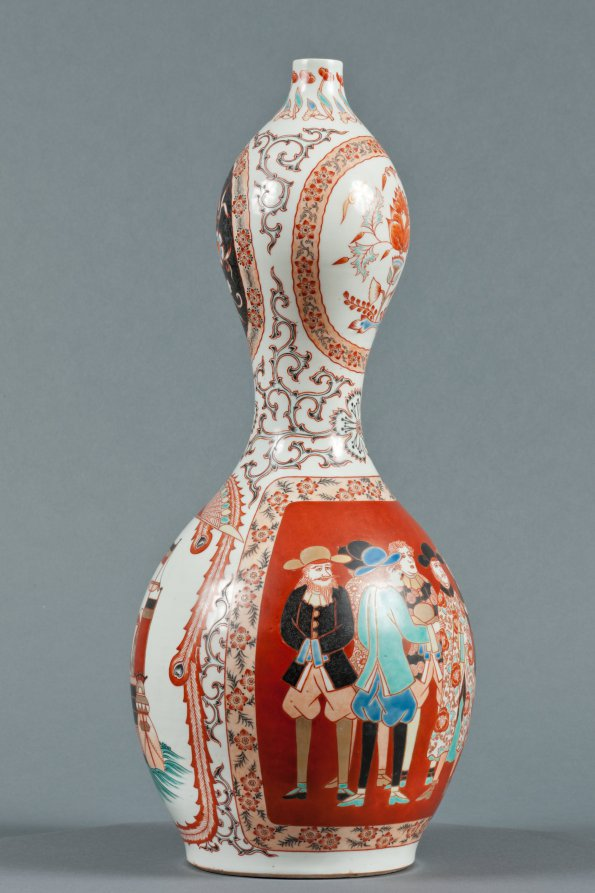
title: Bottle with Western Ships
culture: Japan, Edo period (1615–1868)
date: c. 1800–1868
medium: Porcelain with decoration in colored enamels and underglaze blue, overglaze enamels, and gold (Hizen ware, Arita type)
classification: Ceramic